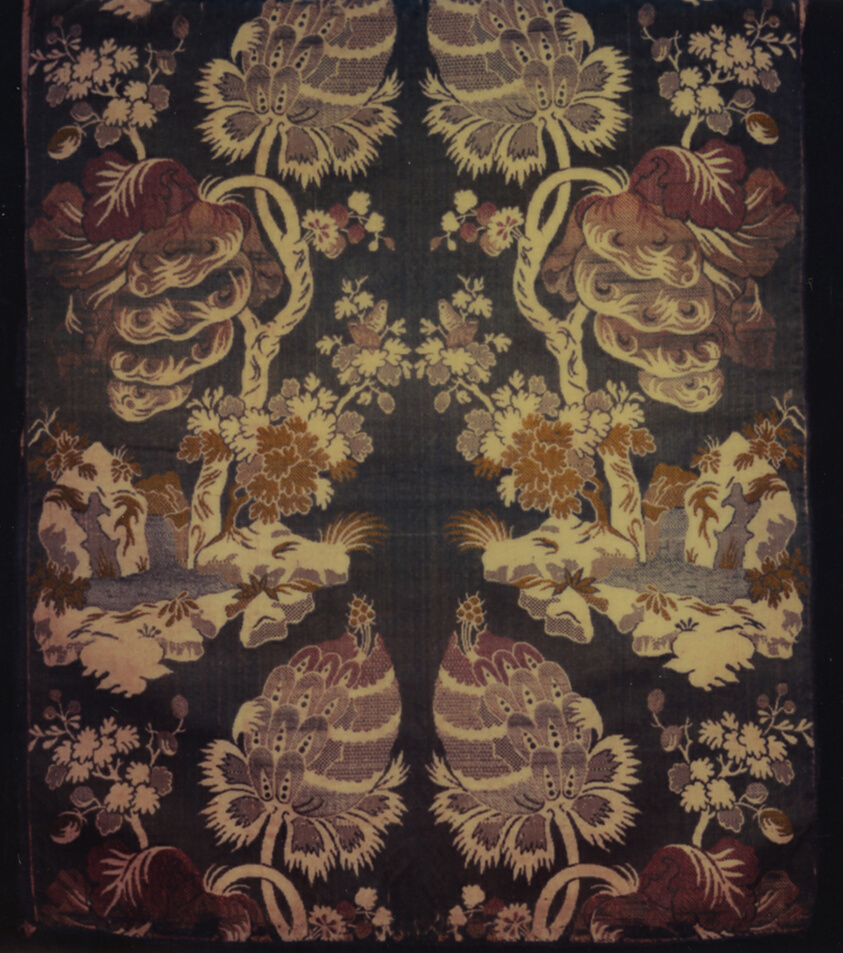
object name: Textile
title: Panel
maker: In the style of Jean Revel (French, 1684–1751); France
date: 1733/35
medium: Silk, warp-float faced satin weave with supplementary patterning wefts bound in twill interlacings and plain interlacings of secondary binding warps and ground wefts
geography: France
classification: textile; weaving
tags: foliage